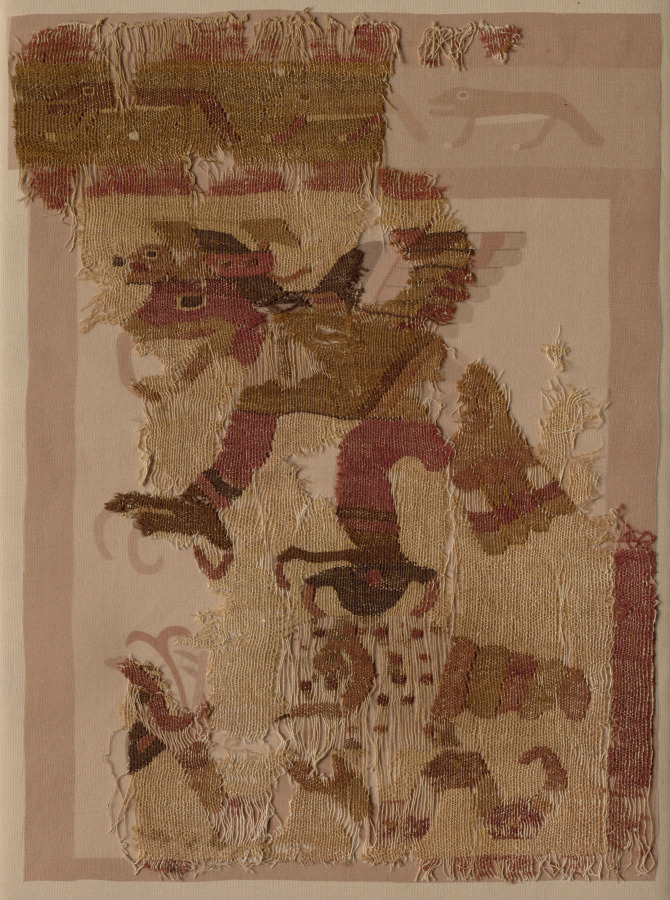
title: Textile Fragment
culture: Peru, Moche, north coast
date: c. 50–650 CE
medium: cotton and camelid fiber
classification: Textile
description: This fragment, one of several in the collection, is a rare survivor of catastrophic rains that destroyed much of the Moche textile legacy and may have helped to bring about the decline of Moche culture. It depicts a serpent and a snail beneath a hovering raptorial bird—perhaps a snail kite, a type of hawk named after its favored food. The size of the motifs implies that the original textile was large; a mantle (a shawl-like garment) or a hanging are among the possibilities.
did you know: This fragment is a rare survivor of floods that destroyed much of the Moche textile record.